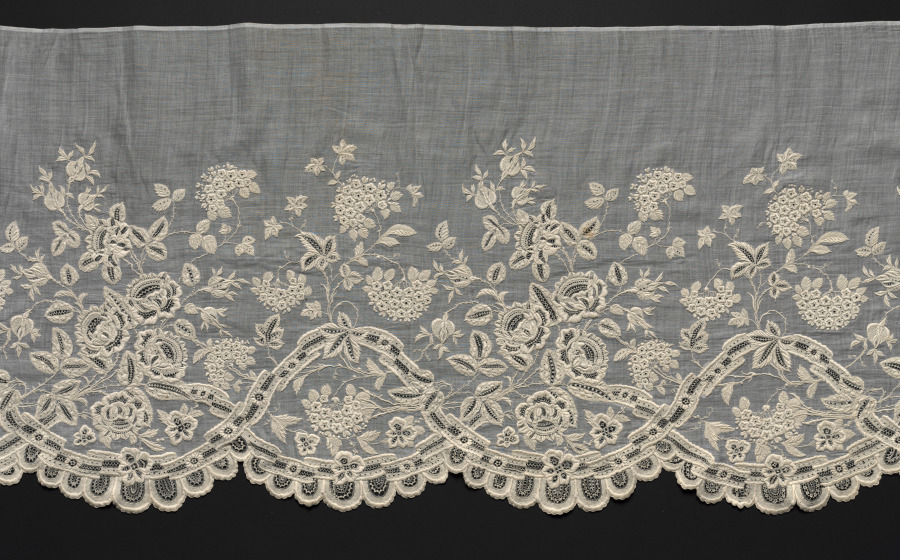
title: Flounce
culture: France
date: 1800–1820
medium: Plain weave cotton: embroidered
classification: Embroidery